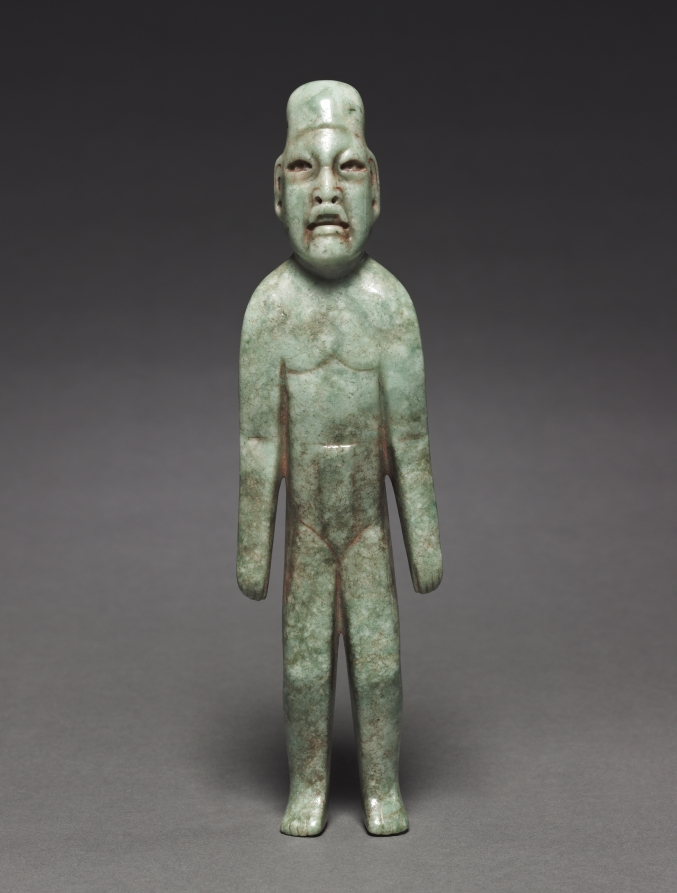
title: Standing Figurine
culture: Mesoamerica, Mexico, Olmec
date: 1900s(?)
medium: polished jadite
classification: Sculpture